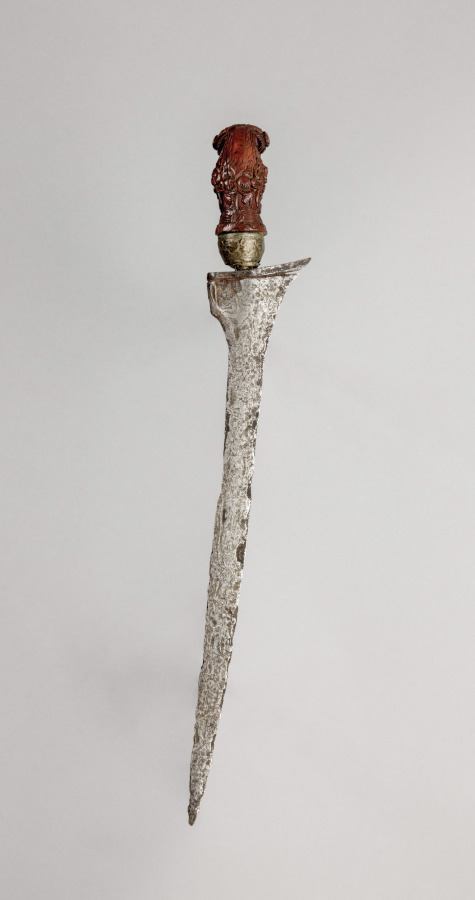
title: Sword (Kris)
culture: Java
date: 1800s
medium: iron with carved wooden handle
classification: Arms and Armor